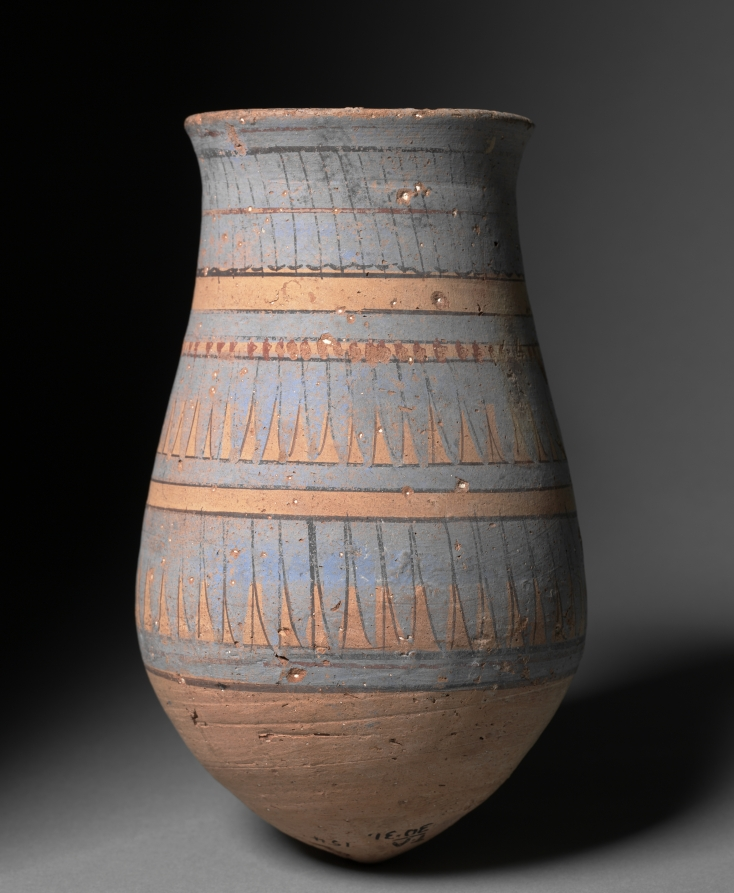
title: Blue-Painted Jar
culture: Egypt, Amarna, house T.36.54. Excavations of the Egypt Exploration Society, 1930, New Kingdom (1540–1069 BCE), Dynasty 18, reign of Akhenaten (1351–1334 BCE)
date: 1353–1337 BCE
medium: Nile silt ware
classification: Vessels